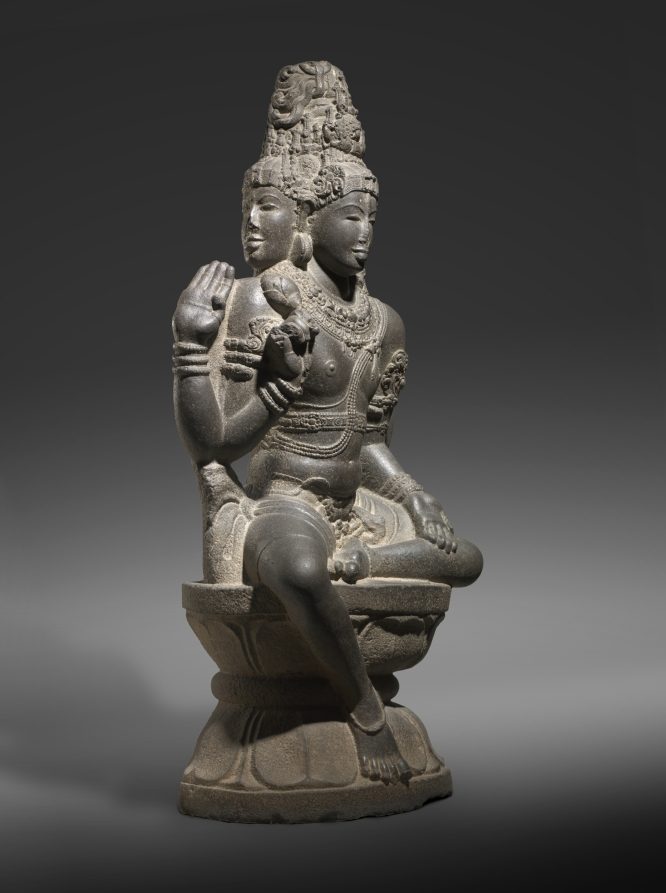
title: Brahma-Shiva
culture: South India, Tamil Nadu, Chola dynasty, late 10th - early 11th century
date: late 900s–1000s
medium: granite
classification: Sculpture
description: In the Hindu pantheon Brahma is in charge of carrying out the work of creation. In this tour-de-force of South Indian temple sculpture, he is in a special regal aspect, with the only elements of his typical priestly appearance being the prayer beads and the matted dreadlocks piled on his head. Four arms connote superhuman power, and four heads convey the idea that his creative activities spread in all four directions. His upper right hand enjoins freedom from fear, and the lower holds a lotus bud associated with birth and the process of creation. His lowered left hand is held in the gift-giving gesture, suggestive of the gift of creation he will bestow upon the world.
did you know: The back of the sculpture retains the original textured surface from a pointed chisel, suggesting it was in a niche or near a wall, protected from worshippers’ touches.